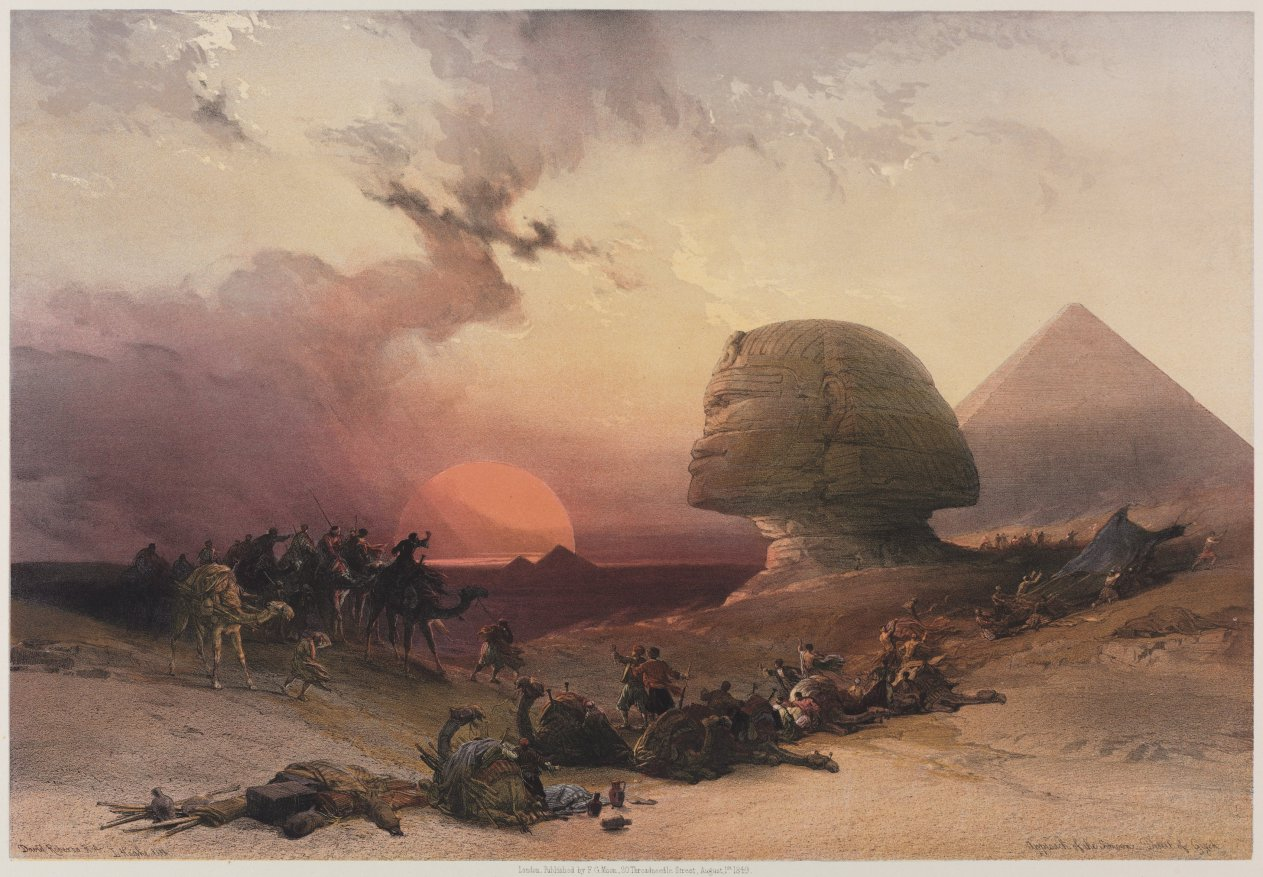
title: Egypt and Nubia, Volume III: Approach of the Simoon-Desert at Gizeh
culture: England, 19th century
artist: Louis Haghe (British, 1806–1885)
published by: F. G. Moon (British, 1797–1871)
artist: after David Roberts (Scottish, 1796–1864)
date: 1849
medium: color lithograph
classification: Print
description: The invention of photography was announced in 1839, but photographers did not arrive in Egypt until around 1850. Prior to that, general knowledge about the ancient sites came from writings and reproductions of the paintings and drawings of adventurous artists. Roberts, the first British artist to produce a series of Egyptian views, traveled through the Middle East in 1838–40. Back in England, he worked with Haghe to translate his drawings into color lithographs, which were published between 1842 and 1849 as an opulent series of portfolios. A stimulating mixture of documentation and romanticism that still moves today’s viewers, Roberts’s images appeared just before the availability of photographic depictions of the region and inspired the photographers who followed in his footsteps.